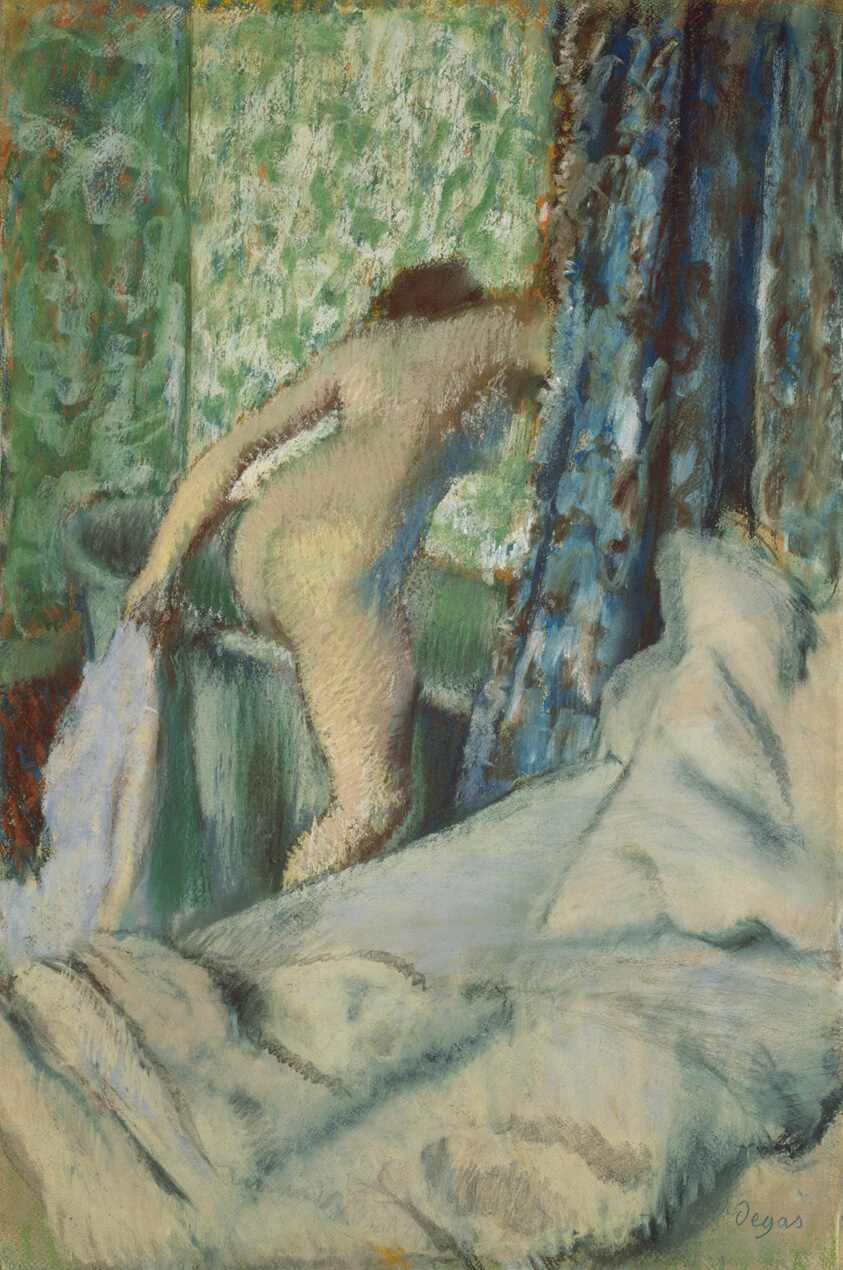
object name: Drawing and Watercolor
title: The Morning Bath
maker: Edgar Degas; French, 1834-1917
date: 1887/90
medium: Pastel on off-white laid paper mounted on board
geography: France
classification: pastel; drawings (visual works); prints and drawing; paper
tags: Century of Progress, interior, women, world's fairs, Chicago World's Fairs